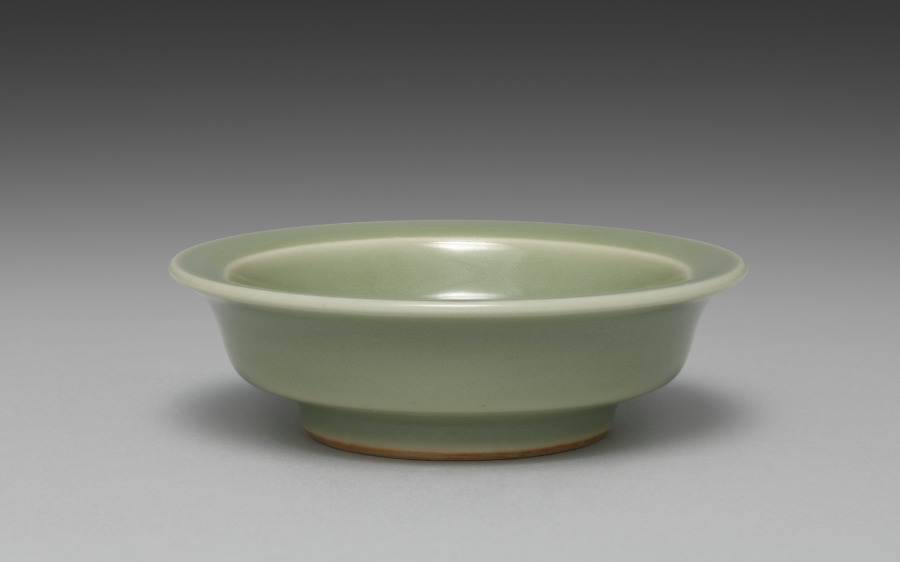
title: Saucer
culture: Japan, Meiji period (1868–1912)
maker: Seifū Yohei III (Japanese, 1851–1914)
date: 1893–1914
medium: One from a set of ten dishes; porcelain with green glaze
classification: Ceramic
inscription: 清風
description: Yohei III’s main output for his sophisticated clientele was in the form of tea sets and dining sets. He created a range of dishes in green glazes. He often produced in pairs, sets of five, or sets of ten. For this set of ten small dishes in a simple, round form that emphasizes the glaze above all, the box lid designates the piece as seiji, or green-glazed porcelain, using a general term for the extensive palette of green glazes often called celadon in English. The box lid further identifies the dishes themselves as tōchō, literally “bean-sized saucers,” a size that makes them suitable for dipping sauces.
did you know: The ten dishes in this set are stored in stacks of five in a two-compartment box.